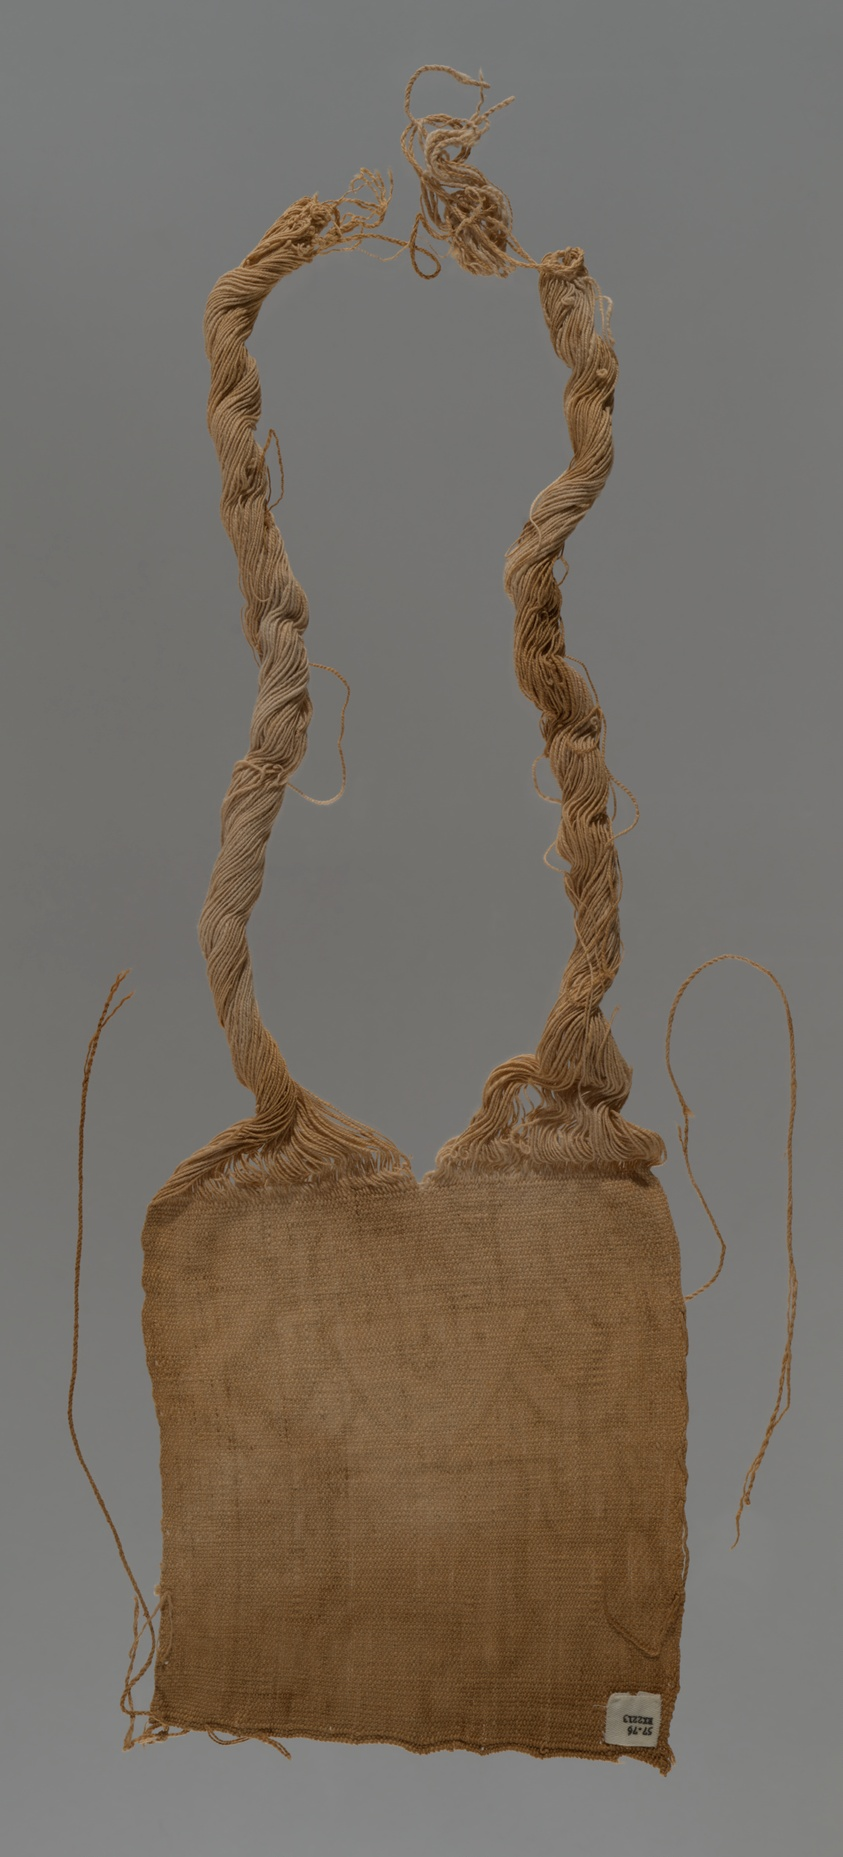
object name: Textile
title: Mummy Mask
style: ocucaje, paracas, early horizon, Pre-Columbian, peruvian, andean, andes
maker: Paracas (South coast, Peru)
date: 100/1 B.C.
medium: Cotton, plain weave with bundles of extended warps; painted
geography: Peru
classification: textile; weaving - printed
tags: super/natural